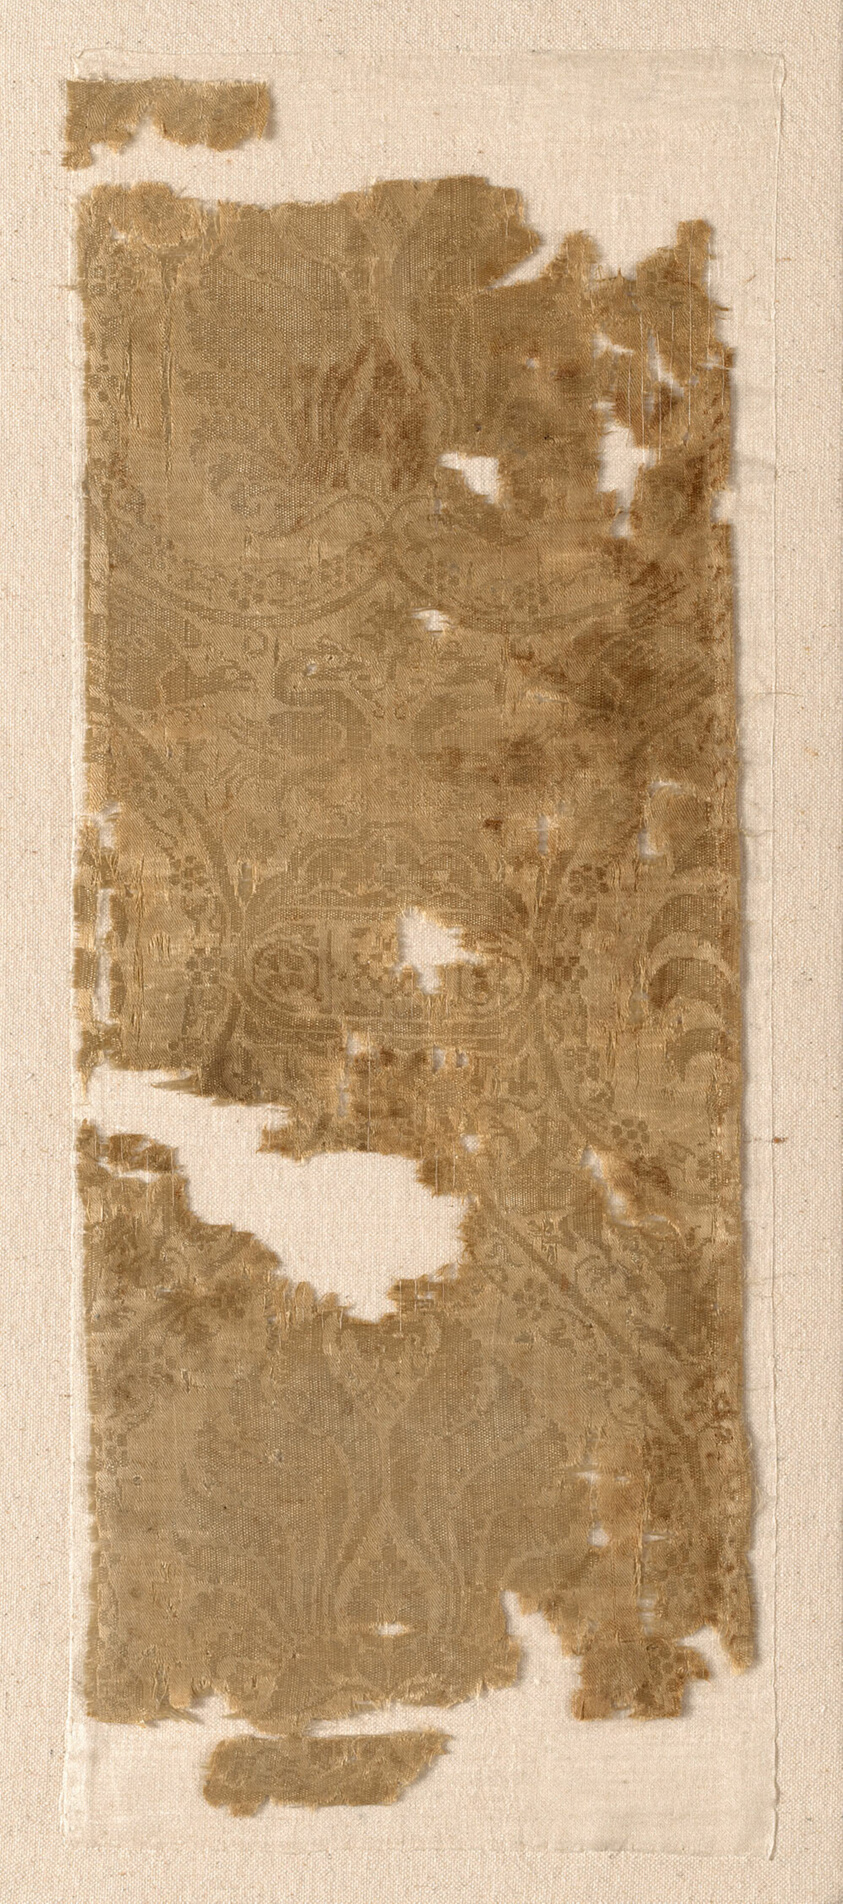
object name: Textile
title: Fragment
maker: Italy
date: late 14th century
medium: Silk, warp-float faced 2:1 twill weave with plain interlacings of secondary binding warps and supplementary patterning wefts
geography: Italy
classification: textile; weaving